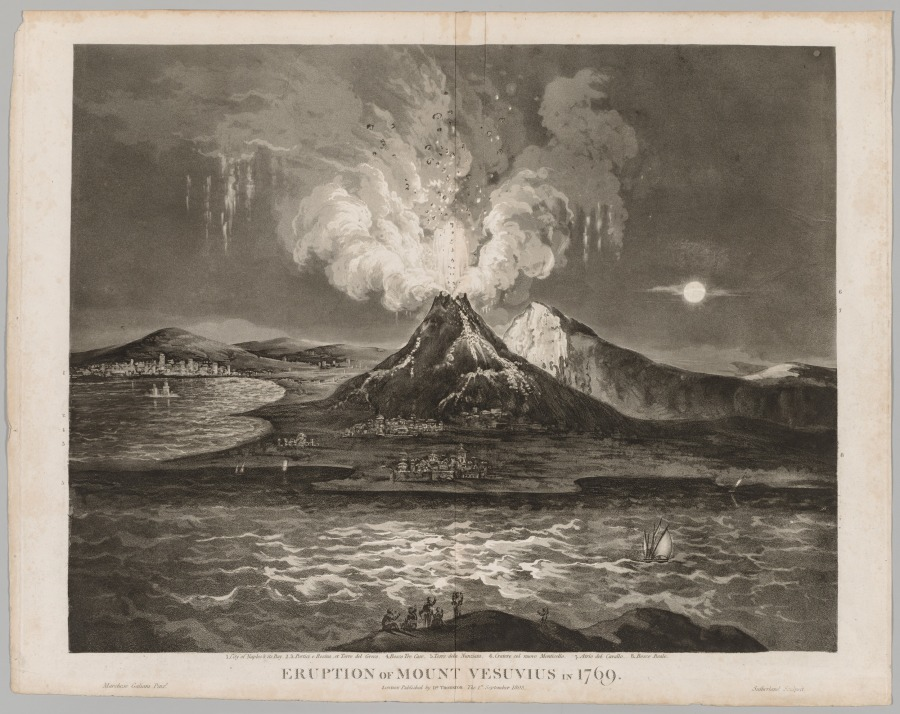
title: Eruption of Mount Vesuvius in 1769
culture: England, 18th century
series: Botanical Extracts: or, Philosophy of Botany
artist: Thomas Sutherland (British, 1785–1838)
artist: after Berardo Galiani (Italian, 1724–1774)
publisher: Robert John Thornton (British, 1768–1837)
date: 1808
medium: aquatint with engraving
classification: Print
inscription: Inscribed, lower left, in margin: Marchese Galiani Pinxt.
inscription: inscribed, lower center, in margin: 1. City of Naples & its Bay. 2.3 Portici e Resina, et Torre del Greco. 4. Bosco Tre Case. 5 Torre dela Nunziata. 6. Cratere col nuovo Monticello. 7. Atrio del Cavallo. 8. Bosco Reale. / ERUPTION OF MOUNT VESUVIUS IN 1769 / LONDON Published by Dr. Thornton The 1st September 1808.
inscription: inscribed, lower right, in margin: Sutherland Sculpsit.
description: With the eruptions of Mount Etna and Mount Vesuvius in the 1700s, volcanoes entered the scientific and popular imagination of Enlightenment Europe. Scientists and philosophers theorized the origins of these spectacular displays; curious tourists visiting Italy wrote home with accounts of burning rivers and destroyed towns. The rediscovery of the ancient sites of Herculaneum and Pompeii, buried by Mount Vesuvius’s eruption in 79 CE, added further fuel to the fire. Attempting to capture the drama of these cataclysmic events, artists innovatively used the tonal range of aquatint and the white of the paper to evoke the dramatic effects of spewing hot lava and burning clouds of volcanic ash.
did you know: Active volcanoes like Mount Etna and Mount Vesuvius were a popular destination for European tourists visiting Italy in the 1700s.